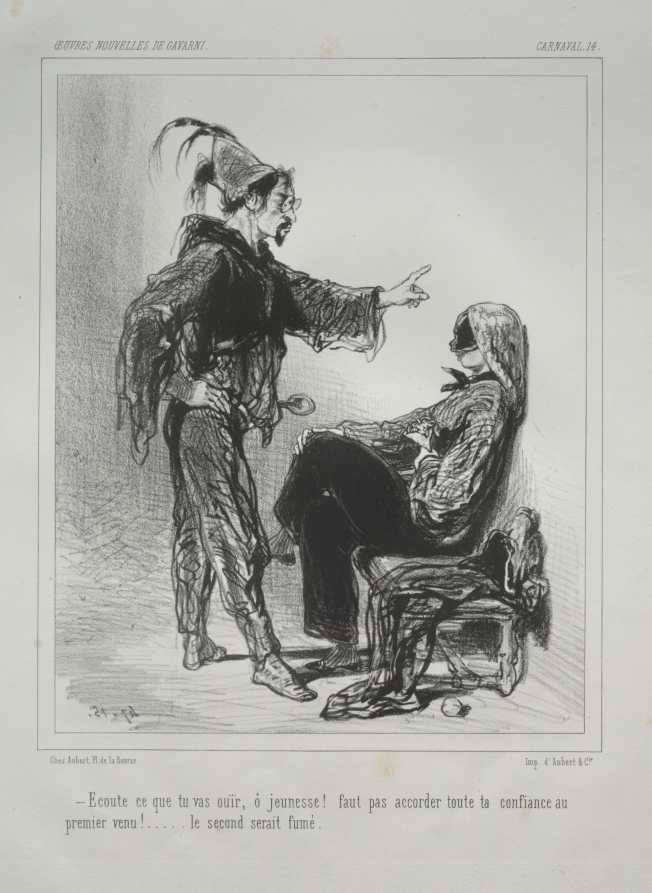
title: Carnaval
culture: France, 19th century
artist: Paul Gavarni (French, 1804–1866)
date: c. 1841–47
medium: lithograph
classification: Print